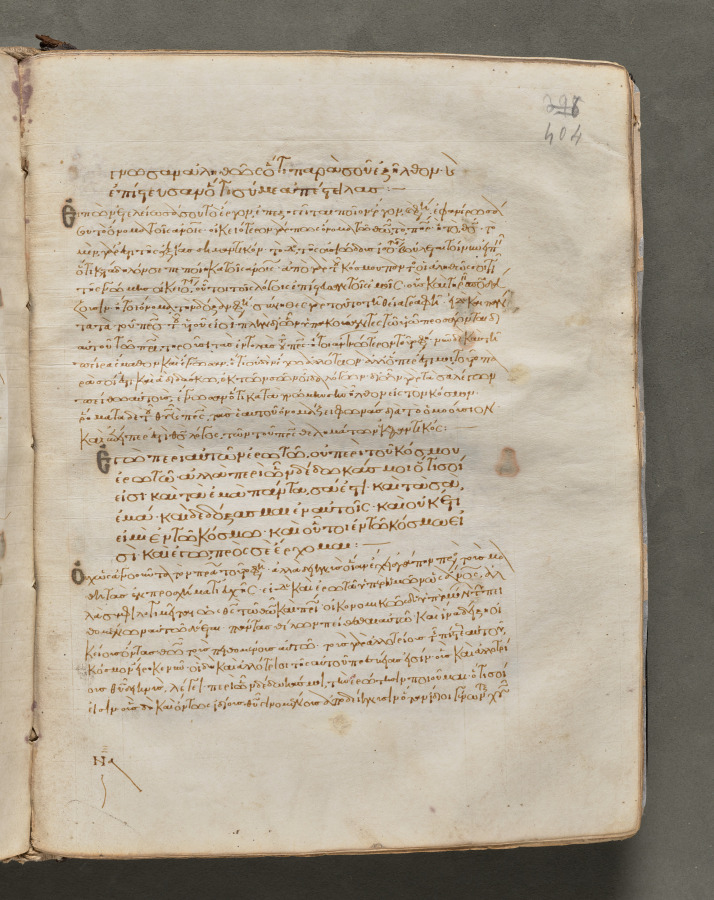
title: Text, folio 404 (recto), from a Gospel Book with Commentaries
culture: Byzantium, Constantinople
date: c. 1000–1100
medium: ink, tempera, and gold on vellum; leather binding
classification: Bound Volume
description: Each of the four gospels in this book opens on a page with brilliantly illuminated borders depicting the author of the text as well as birds—principally peacocks, symbols of the immortality of the soul—and fountains, representing the fountain of life and the salvation of the soul. This volume consists of 428 leaves with texts in Greek. Its level of sophistication suggests that it was probably written and decorated in a monastery in Constantinople.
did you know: Gospel books were carried in procession through Byzantine churches.